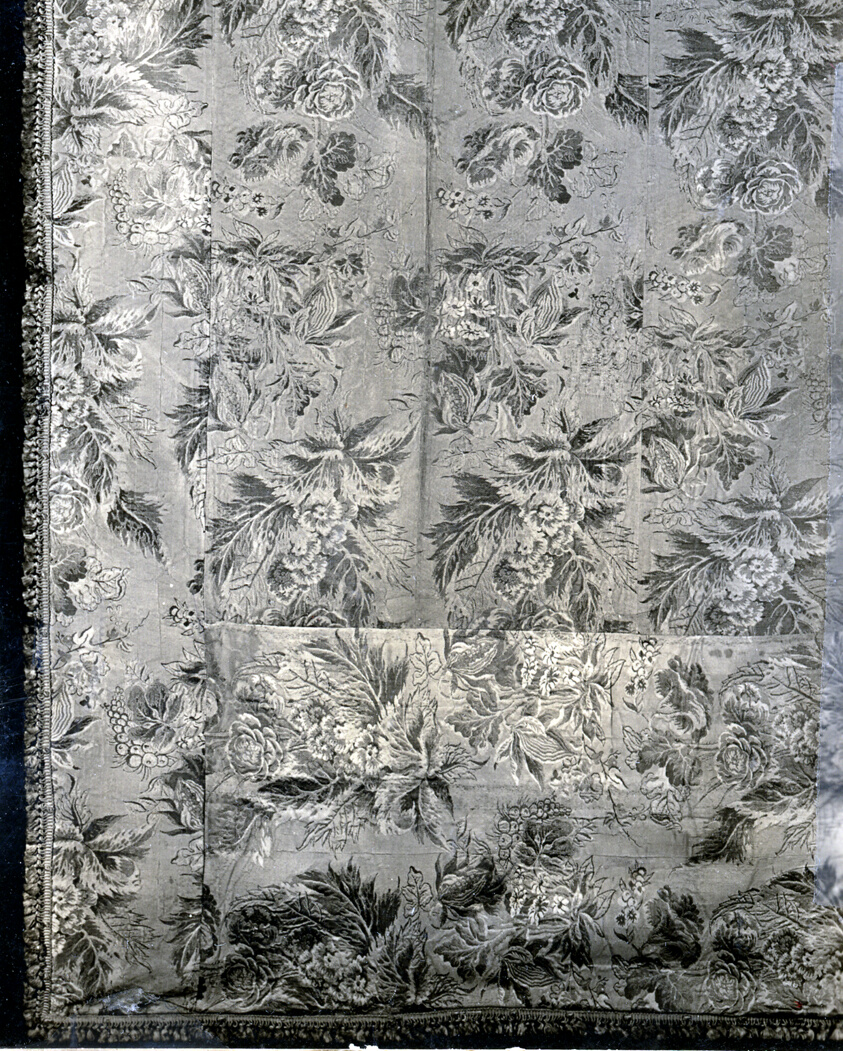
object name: Textile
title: Five Fragments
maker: France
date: 18th century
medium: Plain compound cloth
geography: France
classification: textile; weaving